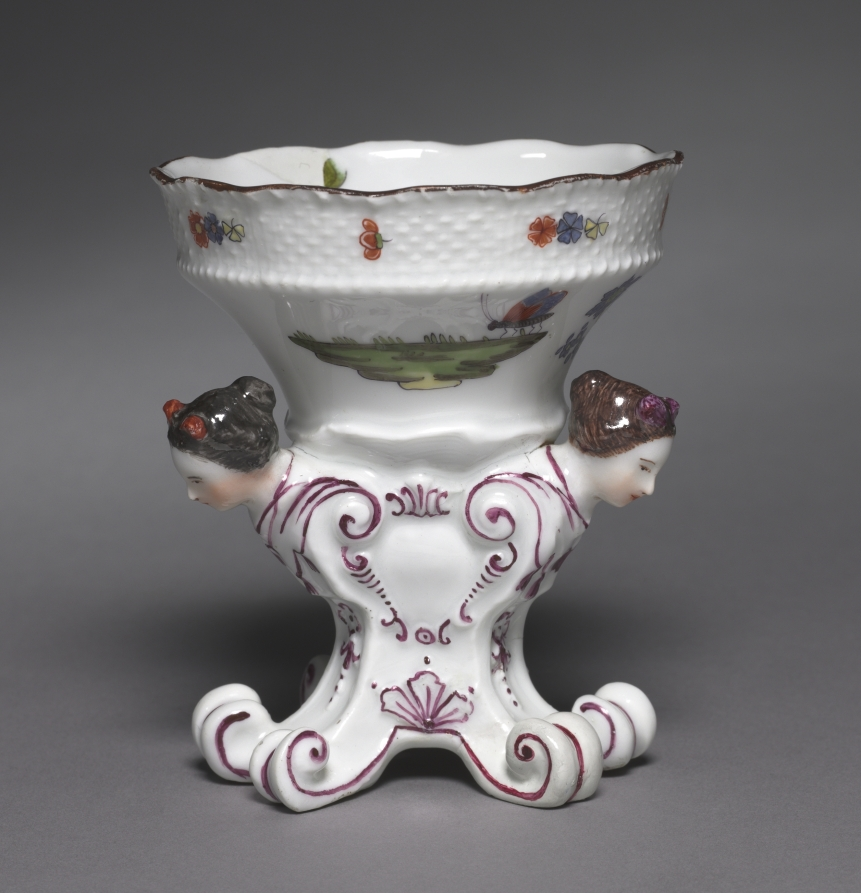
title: Salt Cellar from the Sulkowsky Service (2 of 2)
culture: Germany, Meissen, 18th century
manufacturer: Meissen Porcelain Factory (German, est. c. 1710)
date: 1735–1756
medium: hard-paste porcelain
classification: Ceramic